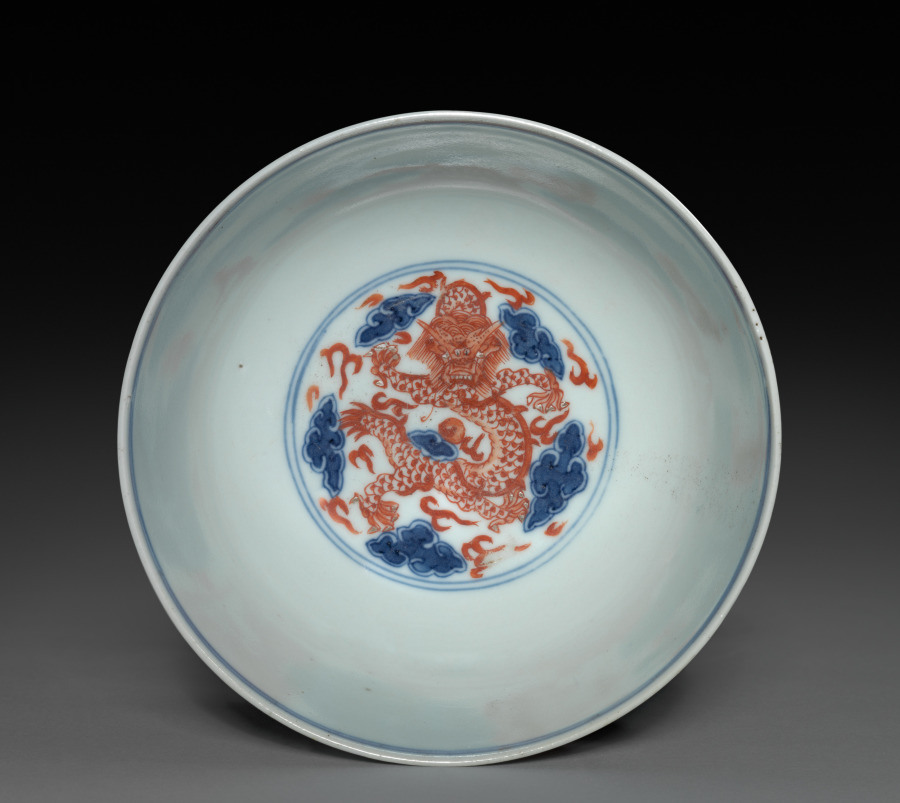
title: Bowl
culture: China, Qing dynasty (1644-1911), Qianlong mark and reign (1736-95)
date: 1736–95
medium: porcelain with overglaze red and underglaze blue enamel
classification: Ceramic